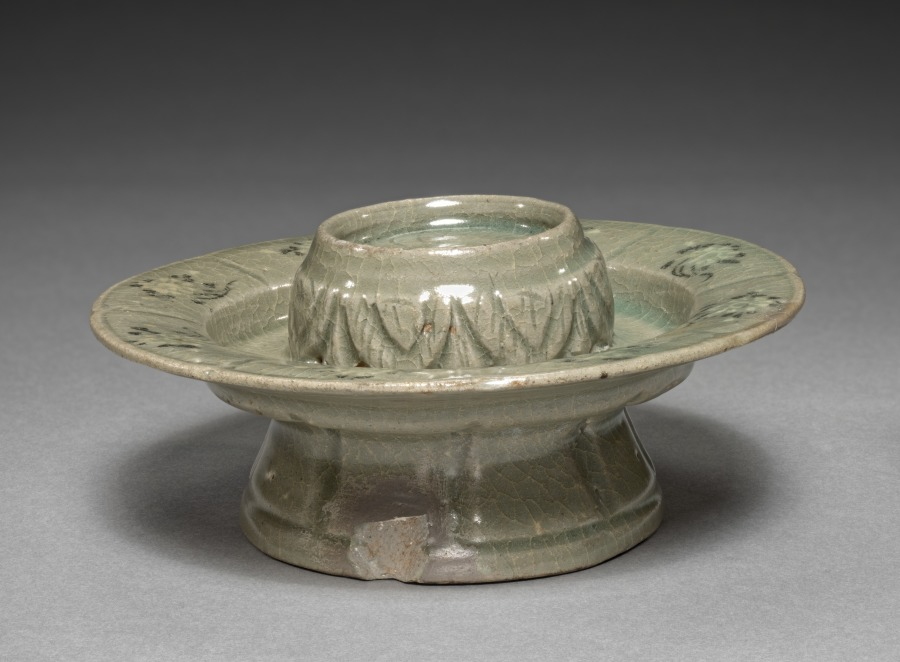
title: Floral-shaped Cup Stand with Inlaid Chrysanthemum Design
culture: Korea, Goryeo dynasty (918–1392)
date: 1100s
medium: inlaid and glazed porcelain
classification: Ceramic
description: As early as the 600s, the practice of drinking tea and wine became an important part of elite culture in Korea. Elites of the Goryeo period commissioned a variety of types of utensils and vessels including this delicate-looking cup stand, not only to make their drinking experience more exciting, but also to show their refined taste.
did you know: During the Goryeo period, a variety of types of tea ware, including this delicate-looking cup stand, were widely used.